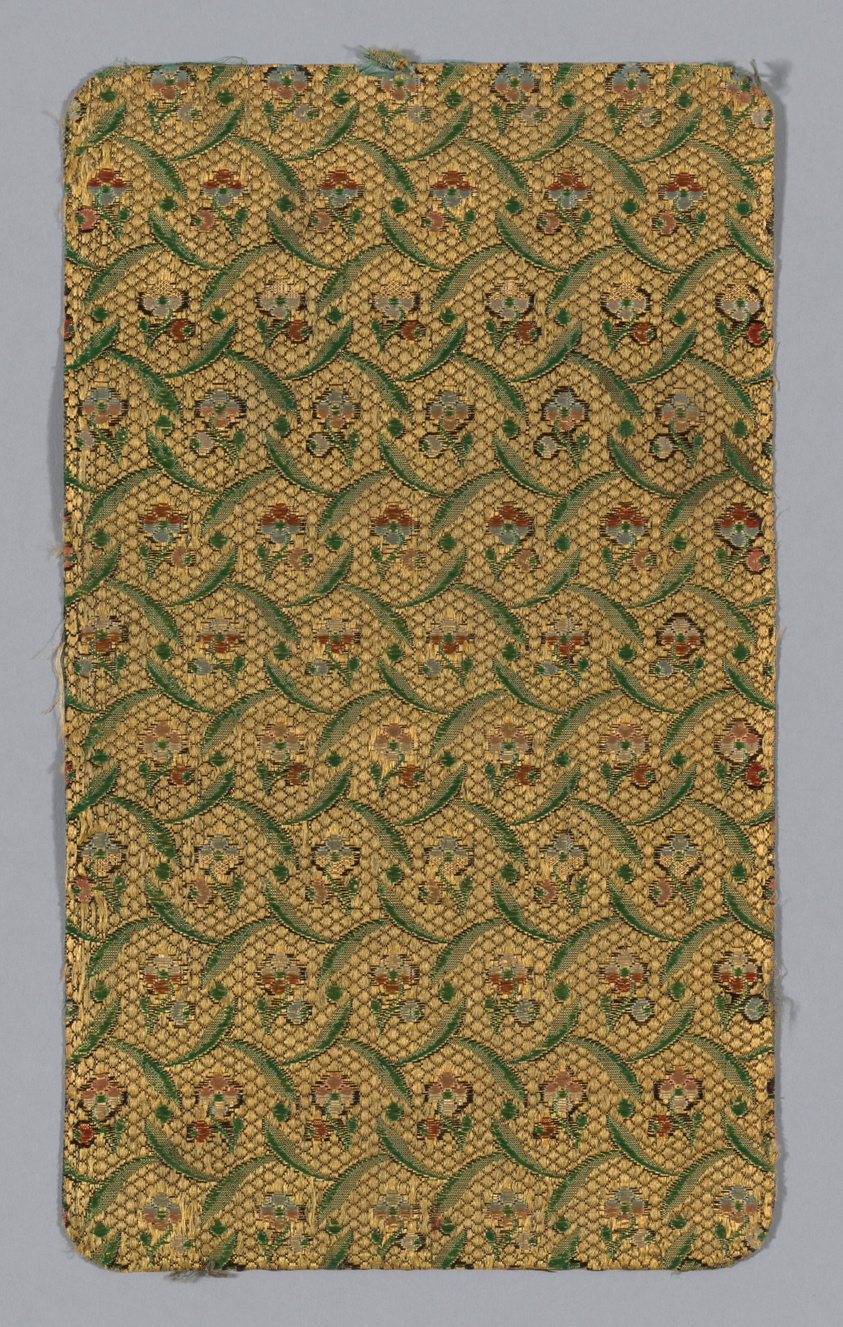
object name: Textile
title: Fragment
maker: Japan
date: 18th century, late Edo period (1789–1868)/ Meiji period (1868–1912)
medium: Fancy compound twill, silk & gilt paper; 3 strips to m.m.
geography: Japan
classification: textile; weaving